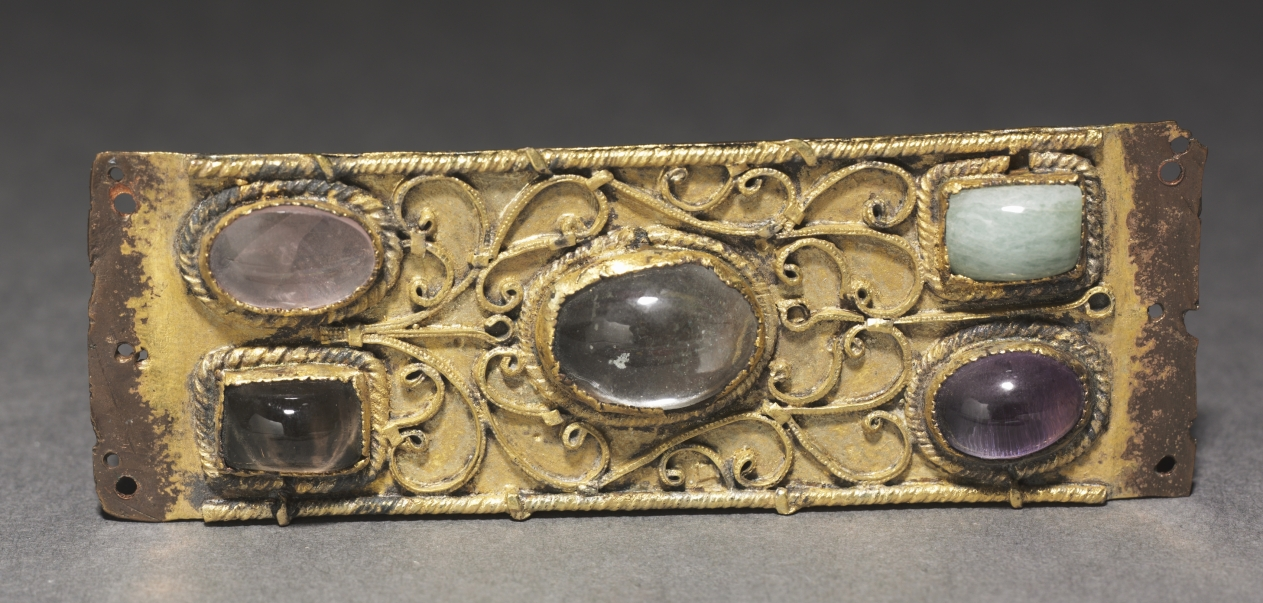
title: Decorative Plaque, Probably from a Reliquary Shrine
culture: Germany, Cologne?, Romanesque period, 12th century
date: c. 1200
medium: gilded copper, gold wire, cabochons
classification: Enamel